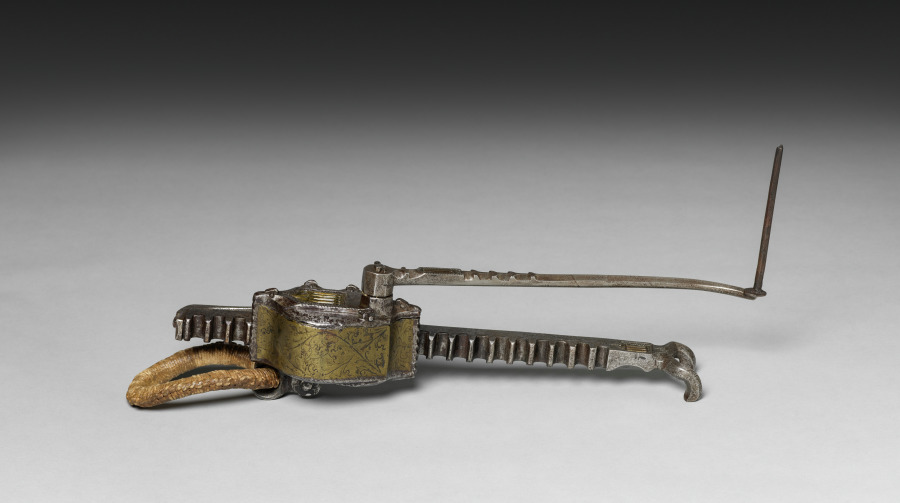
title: Cranequin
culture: France(?)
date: c. 1480–1500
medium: steel and brass; incised decoration; pierced traceried Gothic windows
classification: Arms and Armor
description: Bows made of composite materials were developed during the 1400s. They were immensely powerful and could be spanned only with the aid of a winder called a cranequin like the one seen here.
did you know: The mark, made of inlaid copper, is currently unidentified.